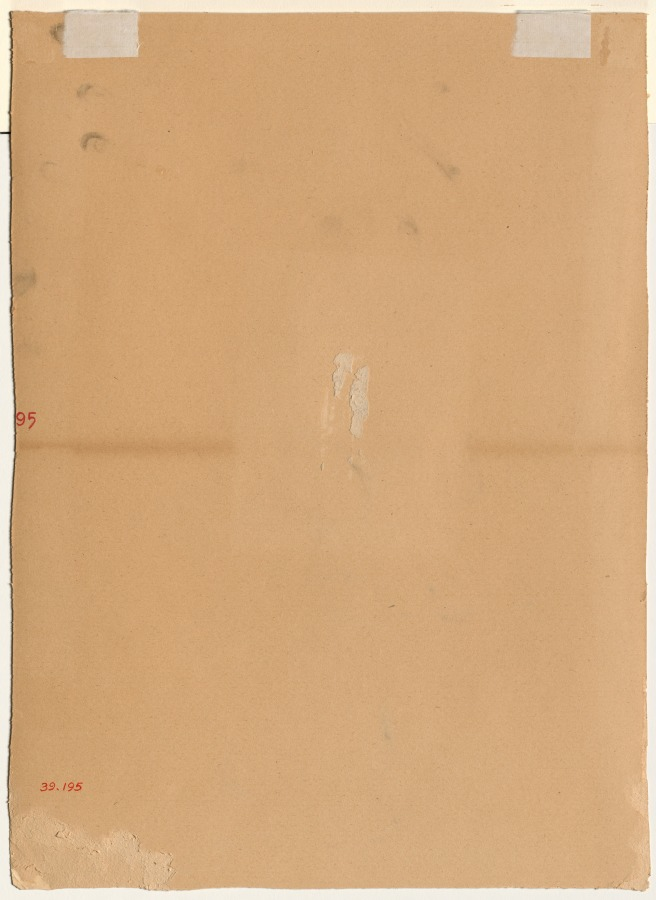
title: Old Grumpy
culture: America, Ohio, Cleveland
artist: Henry Keller (American, born Germany, 1869–1949)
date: 1926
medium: watercolor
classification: Drawing